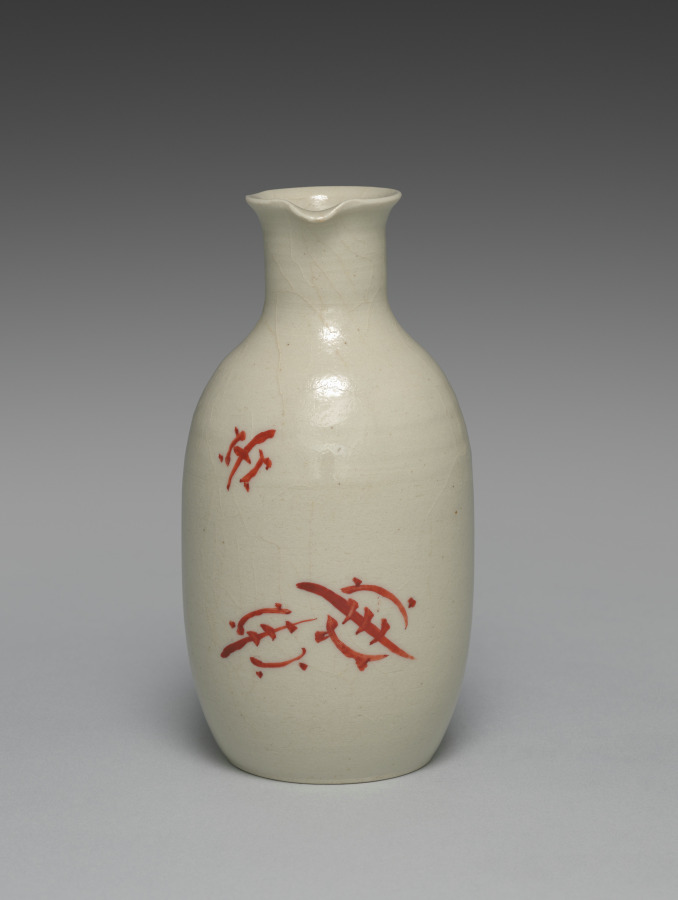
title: Tortoises Sake Pourer from Sake Pourers with Crane and Tortoises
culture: Japan, Meiji period (1868–1912)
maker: Seifū Yohei III (Japanese, 1851–1914)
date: 1893–1914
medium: One of a pair of sake flasks; porcelain with overglaze color enamel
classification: Ceramic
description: This flask has stencil-like paintings of three turtles—a young one with its parents—while the other in this pair has a crane with a leg raised. Cranes and turtles are well-recognized symbols of longevity in East Asia, with the turtle said to live for ten thousand years and the crane for one thousand. Each flask also has a poem on the back, one in Chinese and the other in Japanese. The latter, which appears on the turtle flask, reads kame iwaku kamiyo wa, ore no wakaki toki. The seventeen syllable poem begins with “turtle” and ends with “when I was young.” It can be translated as, “the turtle said the world of the gods began when I was young.”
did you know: This pair of seemingly humble sake pourers celebrate longevity and delight in a literary tradition that embraces multiple forms of poetic expression.